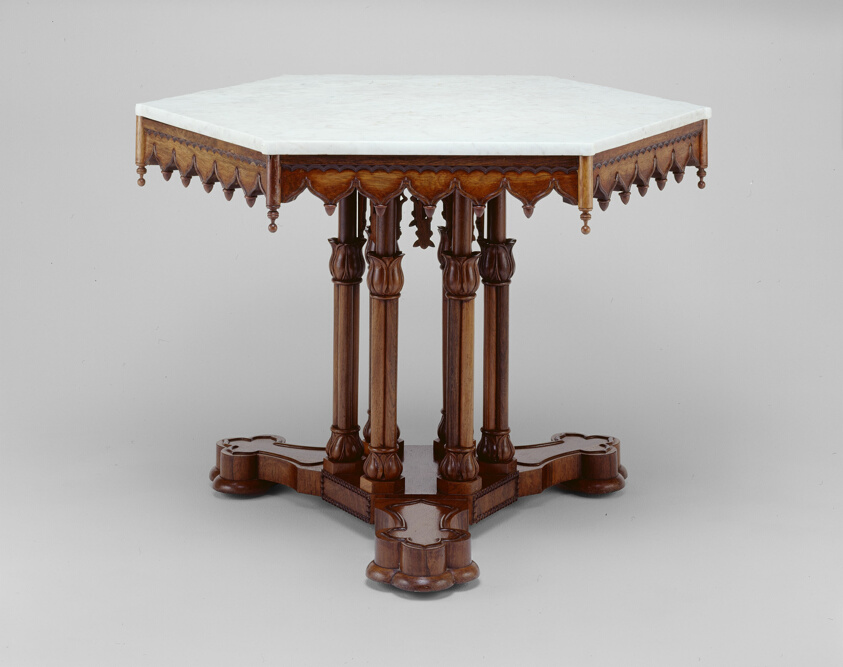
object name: Furniture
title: "Belmead" Center table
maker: Alexander Jackson Davis (American, 1803–1892); Probably made by Alexander Roux (American, born France, c. 1813–1886); New York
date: c. 1846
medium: Rosewood, oak, walnut, marble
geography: New York City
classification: table; furniture; american decorative arts; american arts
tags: furniture